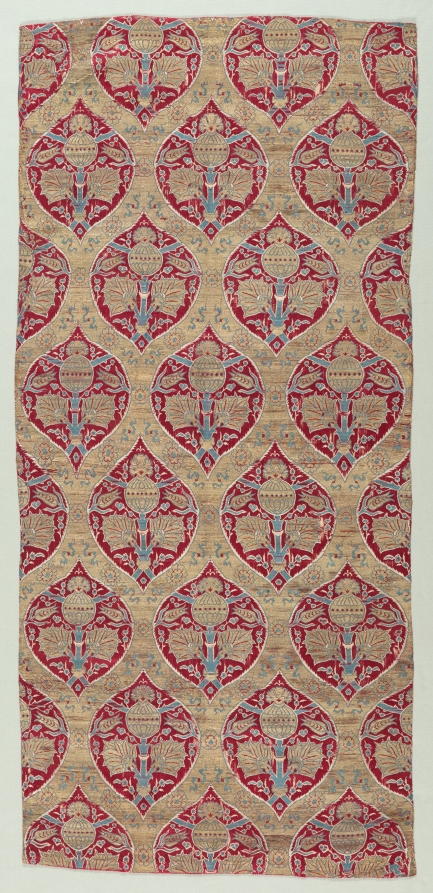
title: Ogival Lattice with Horizontal Design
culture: Turkey, Bursa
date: 1600–1650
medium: Silk and gilt-metal thread: lampas weave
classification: Textile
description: There is a pomegranate design in each ogee (pointed arch) of this silk brocade fragment. The pomegranate is a small tree originating in Persia (today’s Iran) bearing fruit of deep red flesh filled with hundreds of seeds. The pomegranate has been revered as a symbol for health and fertility by many civilizations. In Islam the pomegranate is associated with paradise as described in the Qur’an.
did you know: There is a pomegranate design in each ogee.